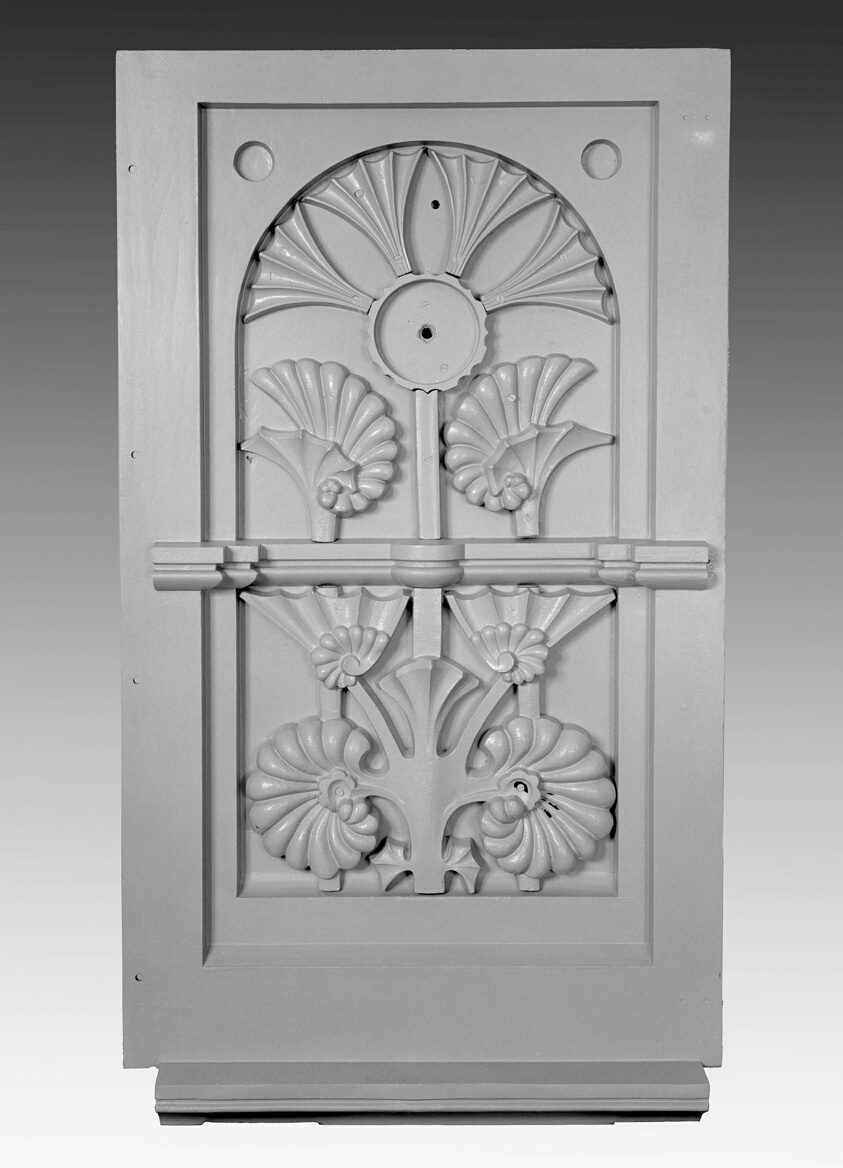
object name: Architectural fragment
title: Frieze Section from the Rothschild Store, Chicago, Illinois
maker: Adler and Sullivan (American, 1883-1896); Louis Sullivan (American, 1856–1924); Dankmar Adler (American, born Germany, 1844–1900)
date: 1881 (demolished 1972)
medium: Cast iron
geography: United States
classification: architectural fragment; architecture